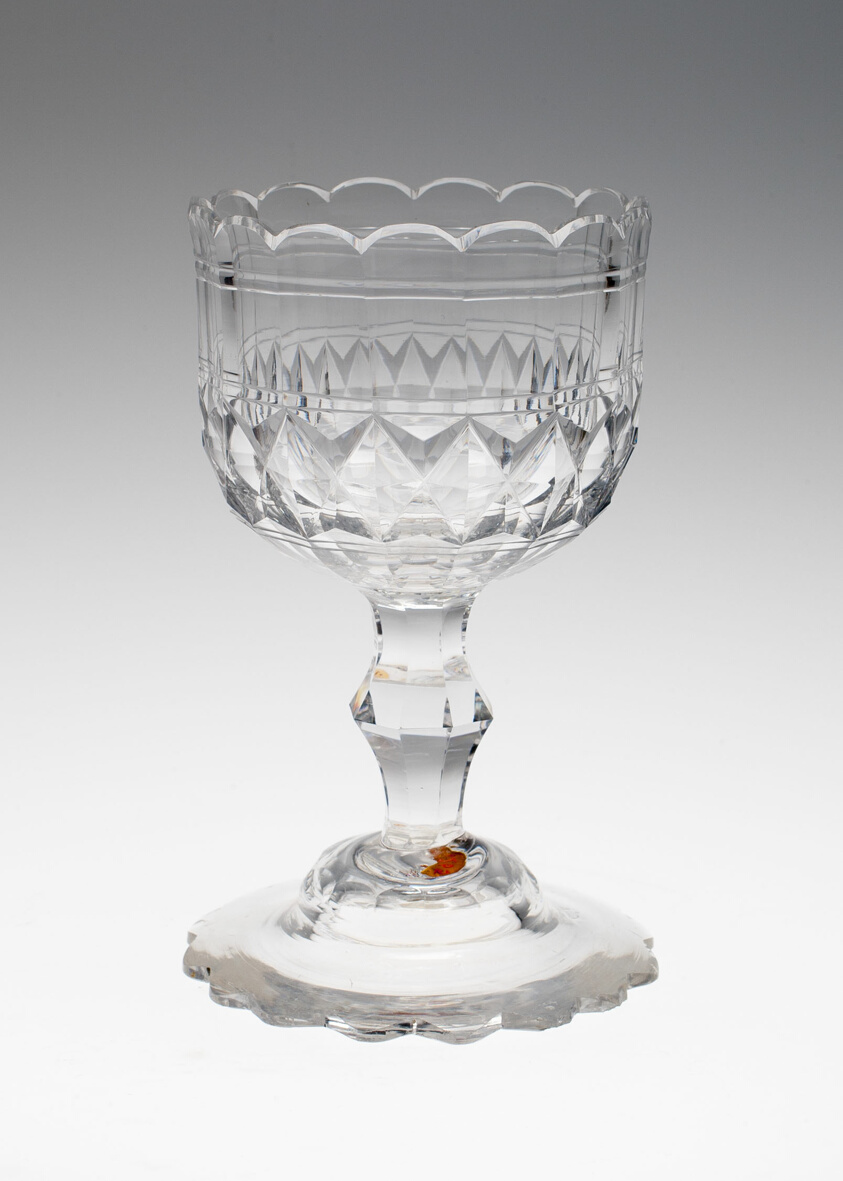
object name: Glass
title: Goblet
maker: England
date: Late 18th century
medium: Glass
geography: England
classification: drinking vessel; glass; european decorative arts